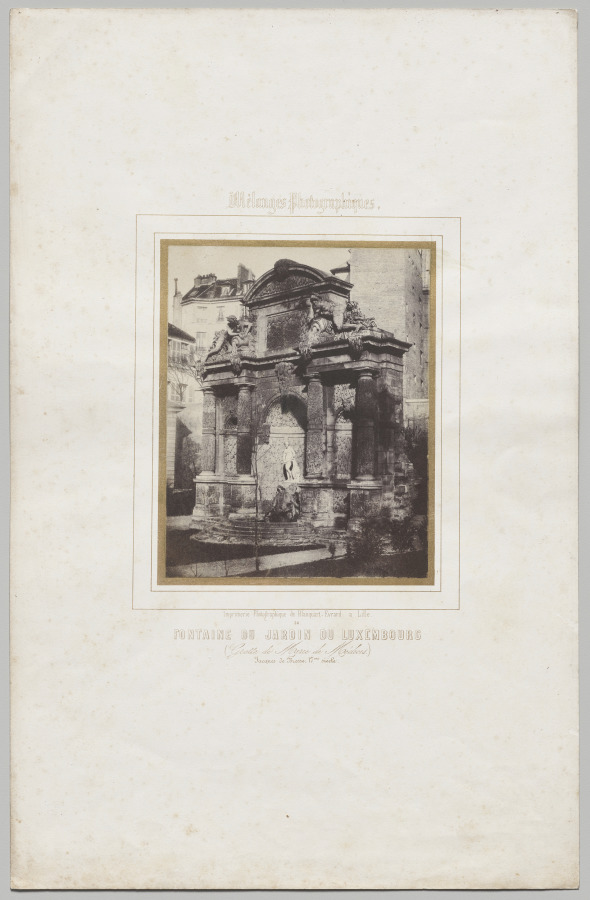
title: Fontaine du Jardin du Luxembourg (grotte de Marie de Médécis)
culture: France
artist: Charles Marville (French, 1813–1879)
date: c. 1850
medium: Salted paper print, Blanquart-Évrard process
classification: Photograph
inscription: Imprinted on recto: "Melanges Photographiques"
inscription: Imprinted on recto: "Imprimerie Photographique de Blanquart-Evrard a Lille"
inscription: Imprinted on recto: "36/Fontaine du Jardin du Luxembourg/(Grotte de Marie de Médicis)/Jacques de Brosse, 17em siecle"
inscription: Written in pencil on verso: "30/14"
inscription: Written in pencil on verso: "20.1 x 16/53.5x 34.5"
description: This fountain was part of those gardens. Charles Marville, who specialized in photographing landscapes, architecture, and urban views, made this photograph four decades after the fountain’s 1811 restoration, which added the white marble statue of Venus bathing. If you go to Paris now, you will see the 1864 restoration, which radically restructured it and moved it 100 feet to make way for a street.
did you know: In the 1620s, French queen Marie de’ Medici built an Italianate palace and gardens on Paris’s Left Bank.